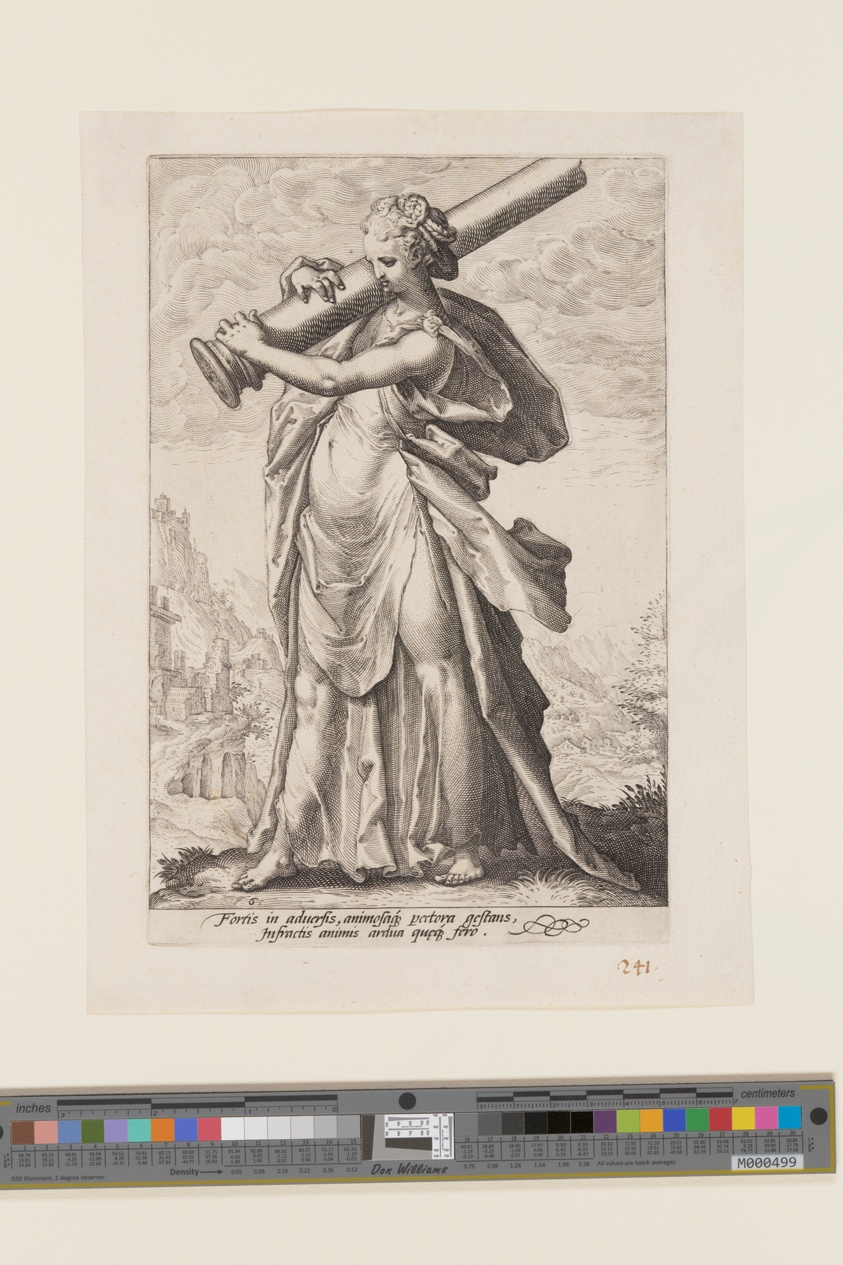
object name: Print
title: Fortitude, from The Virtues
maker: Jacob Matham (Dutch, 1571–1631); after Hendrick Goltzius (Dutch, 1558–1617)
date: c. 1593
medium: Engraving on ivory laid paper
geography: Netherlands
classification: engraving; paper; print; prints and drawing